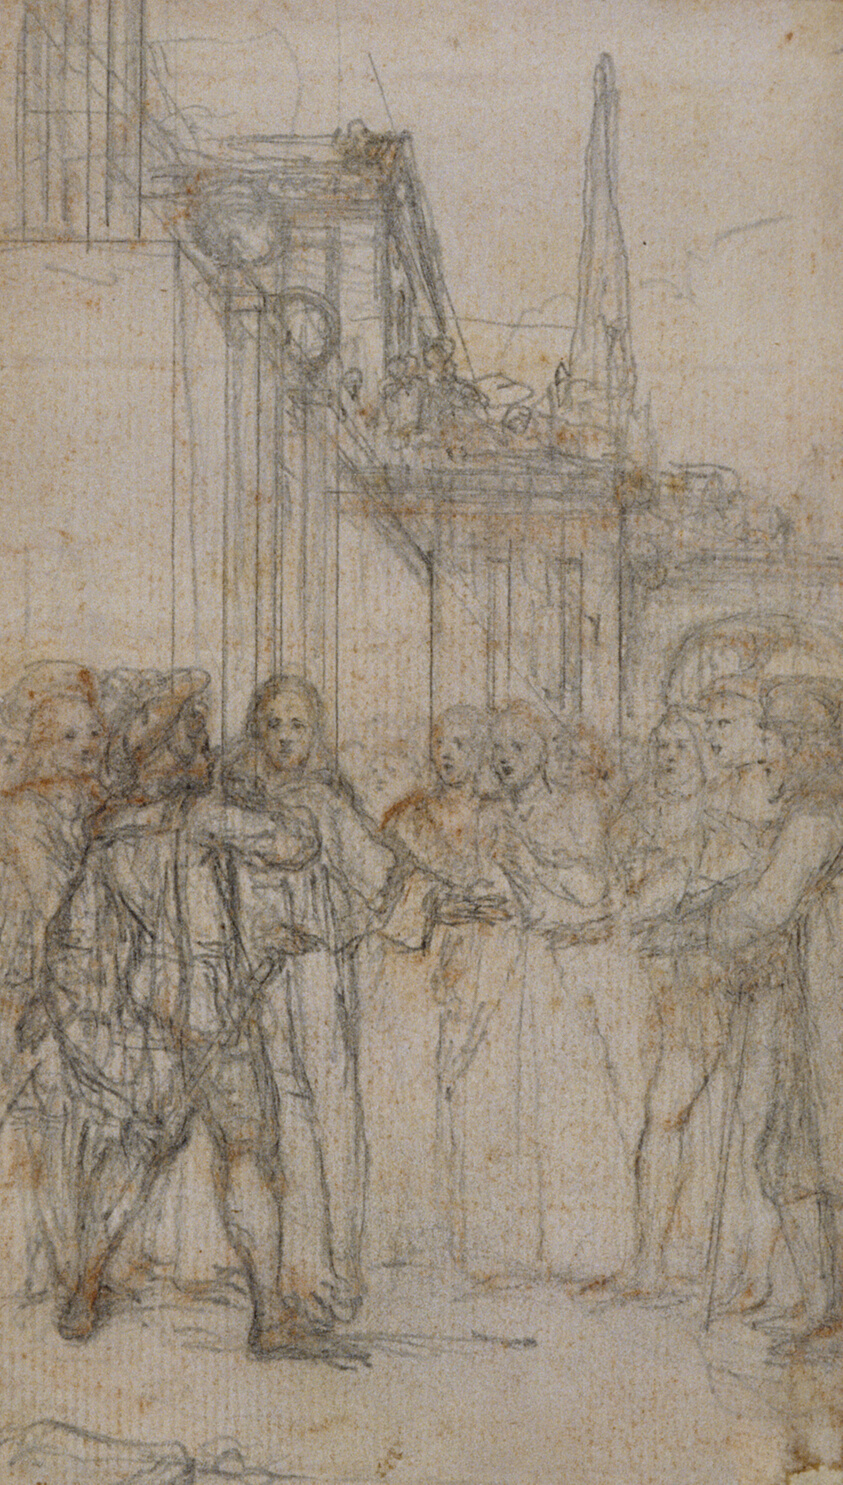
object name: Drawing and Watercolor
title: Literary Illustration: Man with Sword Confronting Group of Figures Before Building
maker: Hubert François Gravelot (French, 1699-1773)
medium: Graphite, over red chalk, on buff laid paper, laid down on ivory laid paper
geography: France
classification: graphite; drawings (visual works); prints and drawing